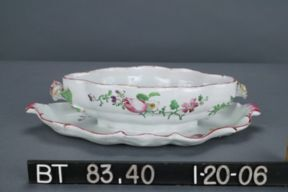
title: Covered Sauce Tureen with Attached Stand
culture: France, Marseilles, 18th century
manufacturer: Veuve Perrin Factory (French)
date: c. 1765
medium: tin-glazed earthenware (faience) with enamel decoration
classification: Ceramic